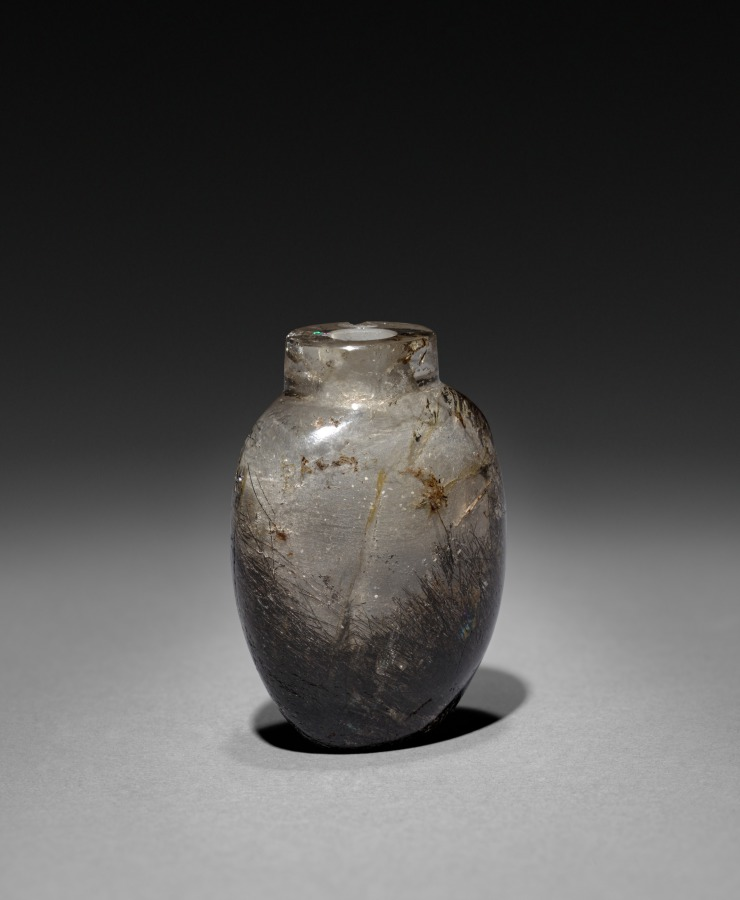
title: Snuff Bottle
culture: China, Qing dynasty (1644-1911)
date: 1644–1911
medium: glass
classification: Glass